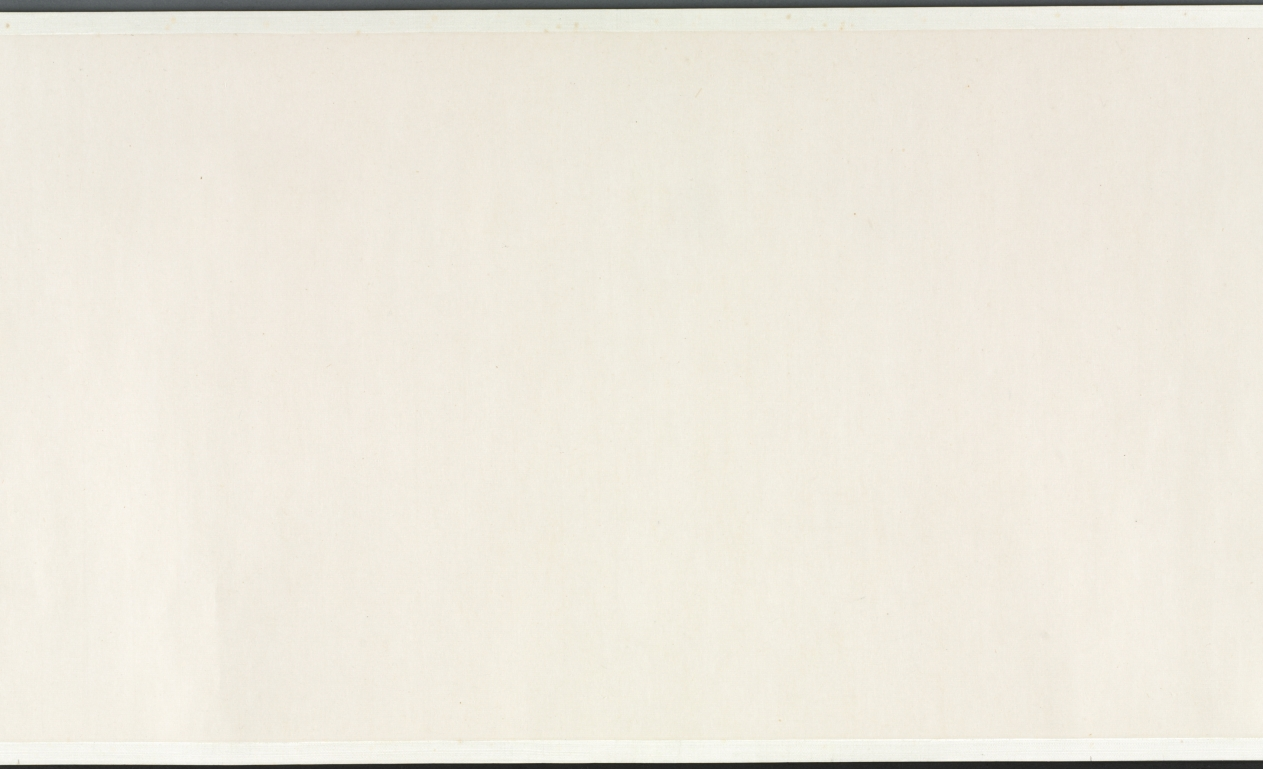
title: Buddha's Conversion of Five Bhiksu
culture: China, Yuan dynasty (1271–1368)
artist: Li Sheng (Chinese, active c. 1324–after 1375)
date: mid-1300s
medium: handscroll; ink on paper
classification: Painting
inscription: 紫篔生李升識 [印] 李氏子雲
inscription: 4 colophons and 12 additional seals: The "Heart" Sutra (Maha Prajnaparamita) text written by Wu Yuqing 吳餘慶 (active early 1400s); 2 seals of Xu Qianxue 徐乾學 (1631–1694); 3 colophons, one dated 1929 and two dated 1936, and 9 seals of Wu Hufan 吳湖帆 (1894–1968); 1 colophon, dated 1932, of Chen Dingshan; 1 seal unidentified.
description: This episode stems from the life of the historical Buddha, who, after his enlightenment, was initially hesitant about preaching his own doctrine. After much personal deliberation and prodding by deities, he finally relented. The first converts were the five guards who served him when he was still a prince. For Li Sheng, this is the pretext of the painting, which moves from the interaction of the bhiksu with the Buddha to a broader awareness of the vast surroundings of the scene.